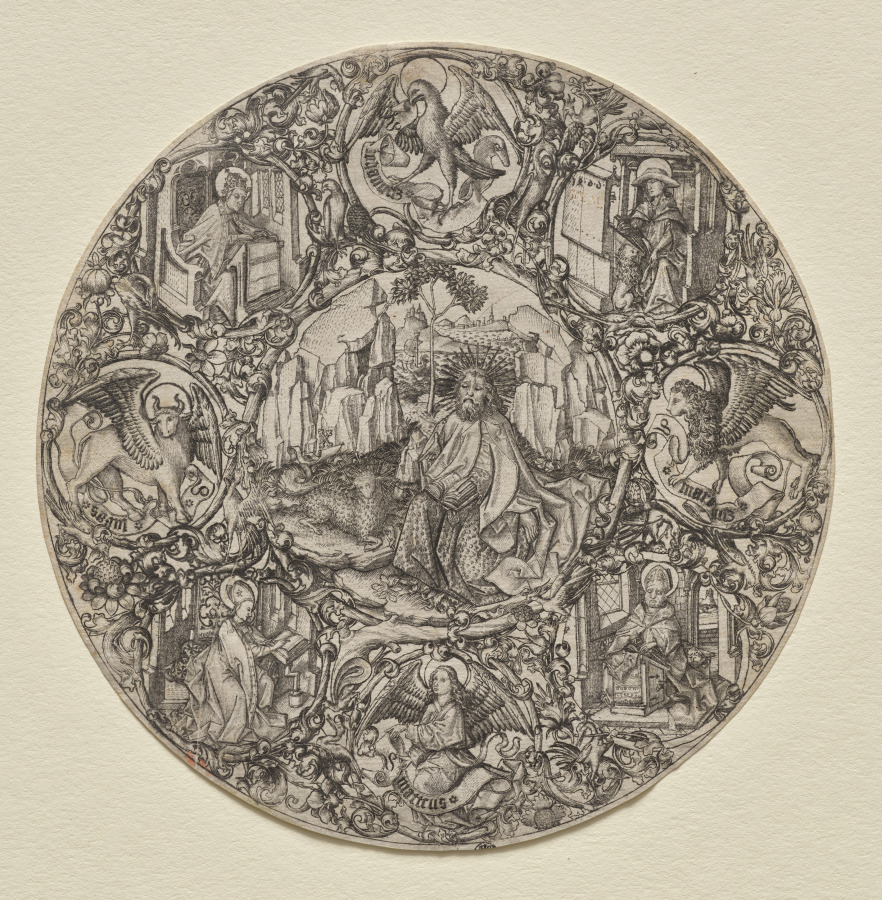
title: St. John the Baptist Surrounded by the Evangelists and Four Fathers of the Latin Church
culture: Germany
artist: Master ES (German, active 1450–67)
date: 1466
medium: engraving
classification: Print